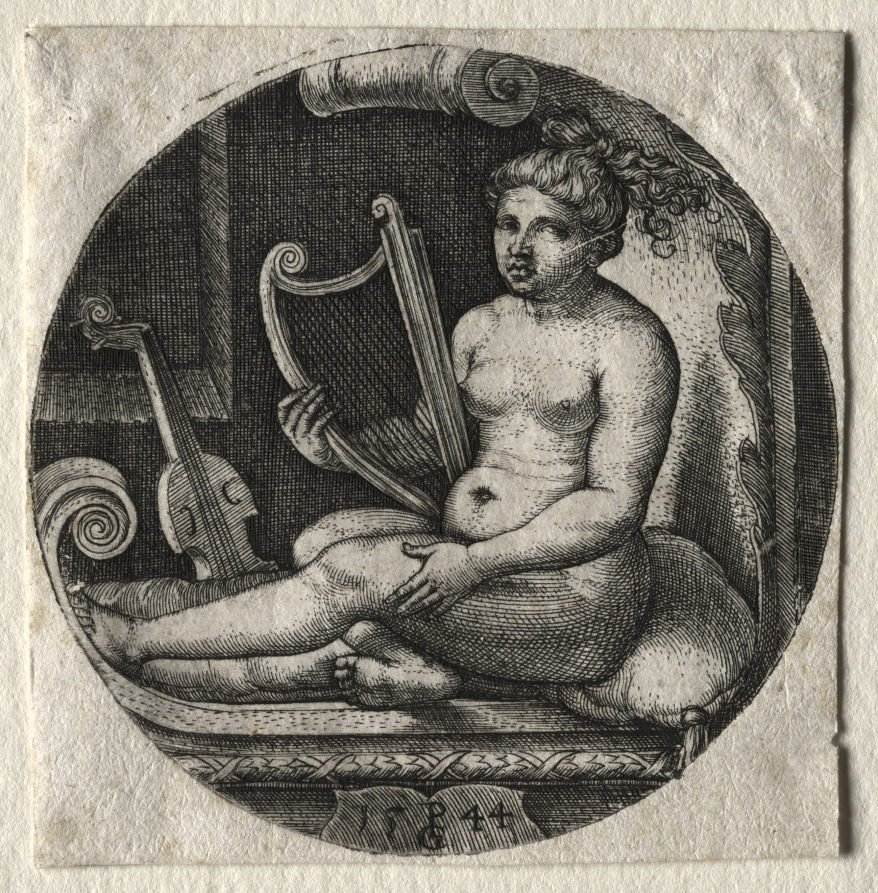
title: The harpist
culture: Germany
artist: Georg Pencz (German, c. 1500–1550)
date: 1544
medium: engraving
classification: Print